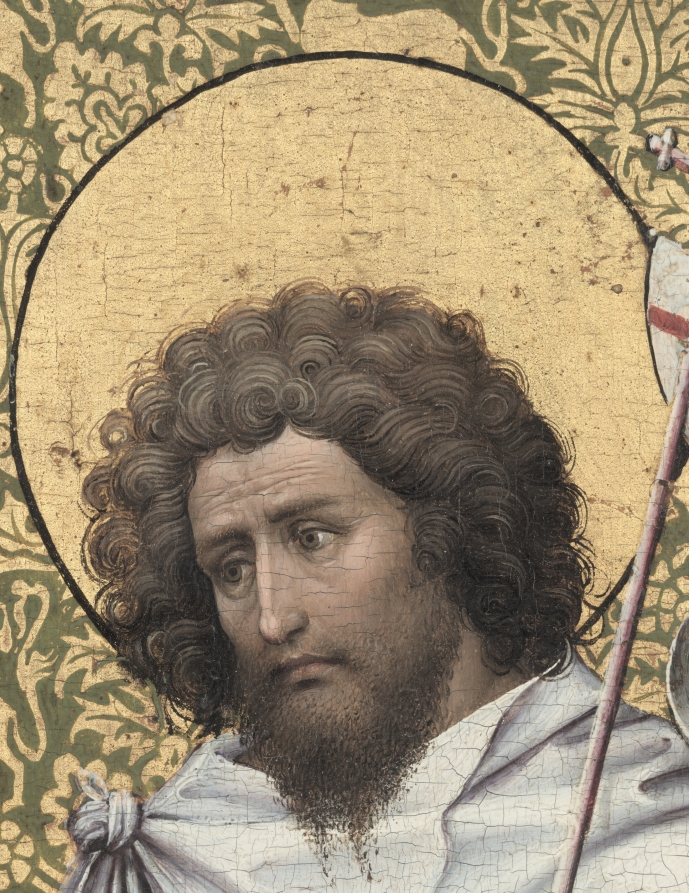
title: John the Baptist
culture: Flanders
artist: Robert Campin (Netherlandish, 1375/79–1444)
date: c. 1410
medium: oil on oak panel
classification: Painting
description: According to tradition, John the Baptist wears a hair shirt under a white cloth, associated with newly baptized Christians. The flag bearing a red cross symbolizes resurrection. In marked contrast, the background features a lavish gold-patterned silk. The display of such luxurious fabrics continues an ancient tradition of using the finest objects in the worship of God. This painting has been cut down along the lower edge and would have originally shown a full-length image of the saint. It was probably the right wing of a triptych, with John the Baptist gazing upon a central image of the Virgin and Child. Campin first settled in Tournai around 1405-6 as a free master of the guild of painters, and he bought citizenship there in 1410, which suggests he was born elsewhere. Although heavily indebted to contemporary masters of manuscript illumination, Campin displayed greater powers of realistic observation than any other painter before him. He was one of the first artists to experiment with the use of oil-based colors, in lieu of egg-based tempera, to achieve the brilliant color typical of this period.